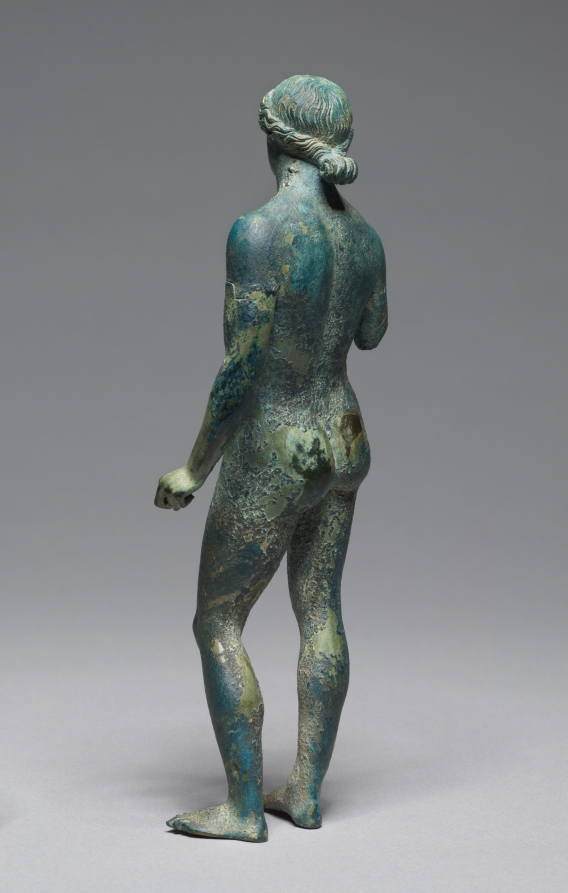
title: Athlete or Apollo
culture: Greece, Macedonia(?)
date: probably 100–1 BCE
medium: bronze with silver inlays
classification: Sculpture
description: This bronze statuette depicts a nude male, perhaps a young athlete or the youthful god Apollo. The figure is made from solid bronze, with a fillet of inlaid silver on his head. The figure’s right arm is broken off just above the elbow. If this is a statue of Apollo, he may have once held a bow and arrow; if it depicts an athlete, he could have held athletic equipment, a symbol of victory, or an offering dish.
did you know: The eyes of this figure are decorated with inlaid silver.